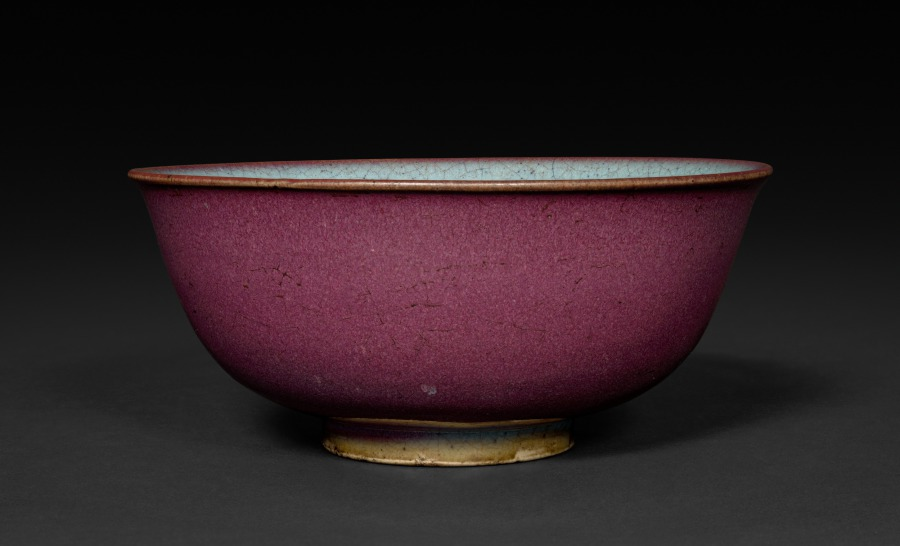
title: Bowl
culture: South China, Yuan dynasty (1271–1368) to Ming dynasty (1368–1644)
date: 1300s–1400s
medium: glazed gray stoneware, Jun ware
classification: Ceramic